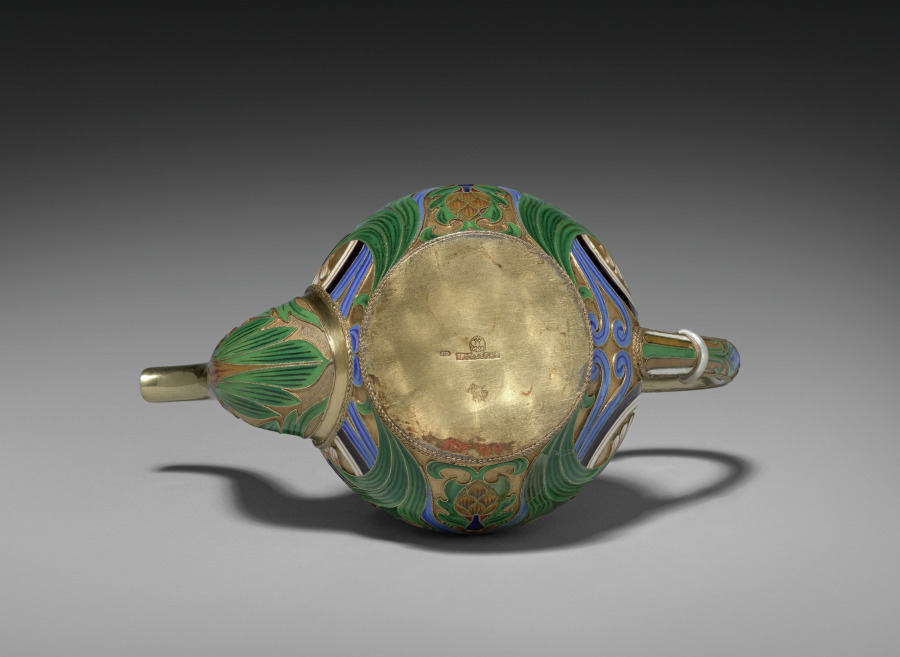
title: Covered Hot Water Pot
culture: Russia, St. Petersburg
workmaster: attributed to Feodor Ivanovich Rückert (Russian, 1840–1917)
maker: House of Fabergé (Russian, 1842–1918)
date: 1887–96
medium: silver gilt, opaque cloisonné enamel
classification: Miscellaneous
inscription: 88, St. George [assay mark for Moscow, 1882-1896]; C. Fabergé (in Cyrillic); double-headed eagle [imperial warrant]; 88; initials of Carl Fabergé (in Cyrillic).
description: Fabergé’s craftsmen in Moscow, especially under the watchful eye of workmaster Feodor Rückert, became known for their work in the pan-Slavic or neo-Russian style, hearkening back to 17th-century motifs of Russian folk art. Often on rather conventional shapes, Rückert and his silversmiths created an explosion of color, achieved through the historic technique of cloisonné enamel in which tiny metal lines are soldered to the surface then filled with glass powders in various colors and fired to create a high gloss finish. The result is a spectacular evocation of the 17th-century originals. Far from mere copies, however, Rückert's designs, such as this tea service, employ naturalistic or abstract motifs in a thoroughly modern adaptation of a remarkable earlier period of Russian art and decoration.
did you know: This covered hot water pot is part of a larger tea set.